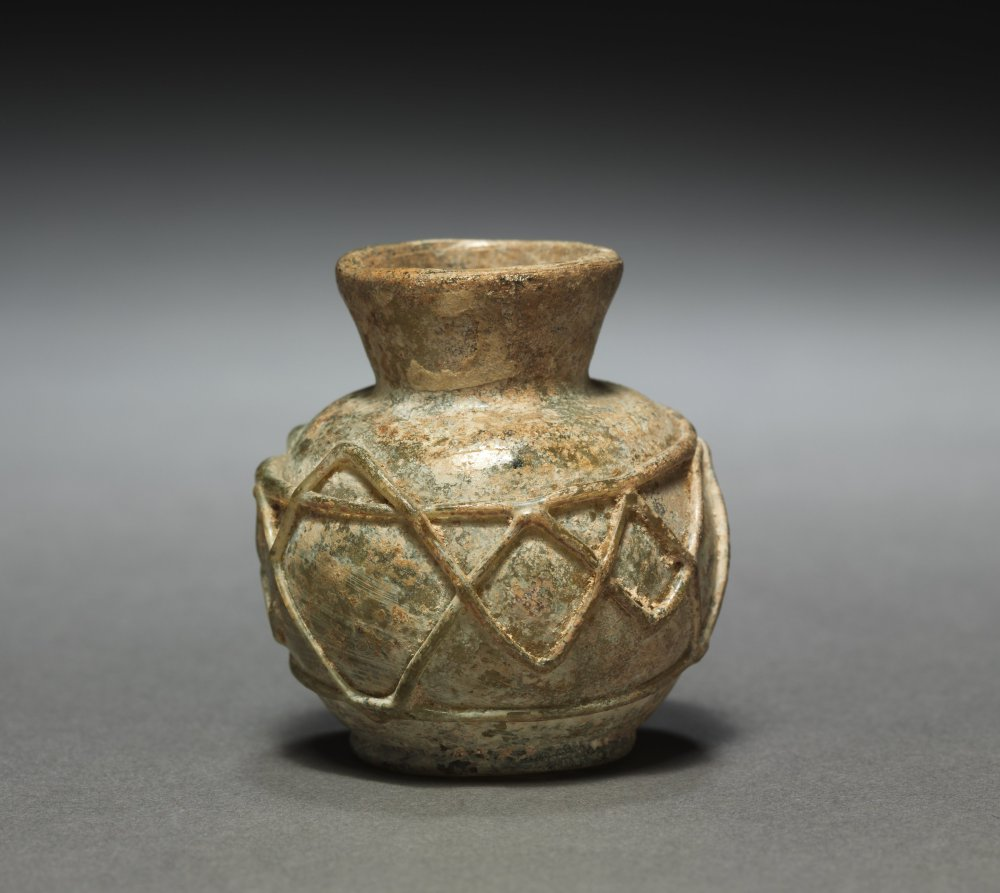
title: Vase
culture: Iran, Sasanian Empire (224–651 CE)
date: c. 224–650 CE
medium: glass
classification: Glass